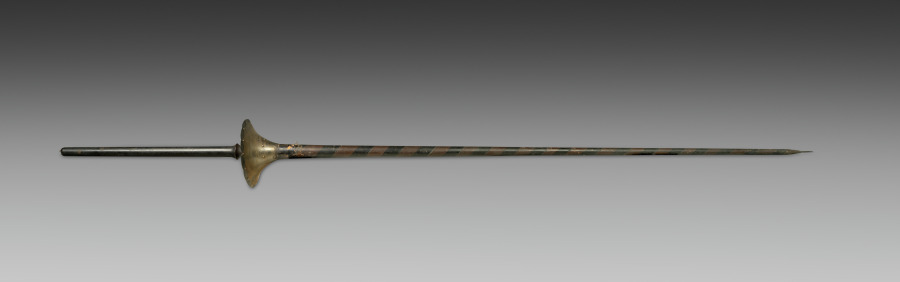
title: Tilting Lance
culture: Germany, late 19th-early 20th Century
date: c. 1875–1925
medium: steel and wood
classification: Arms and Armor